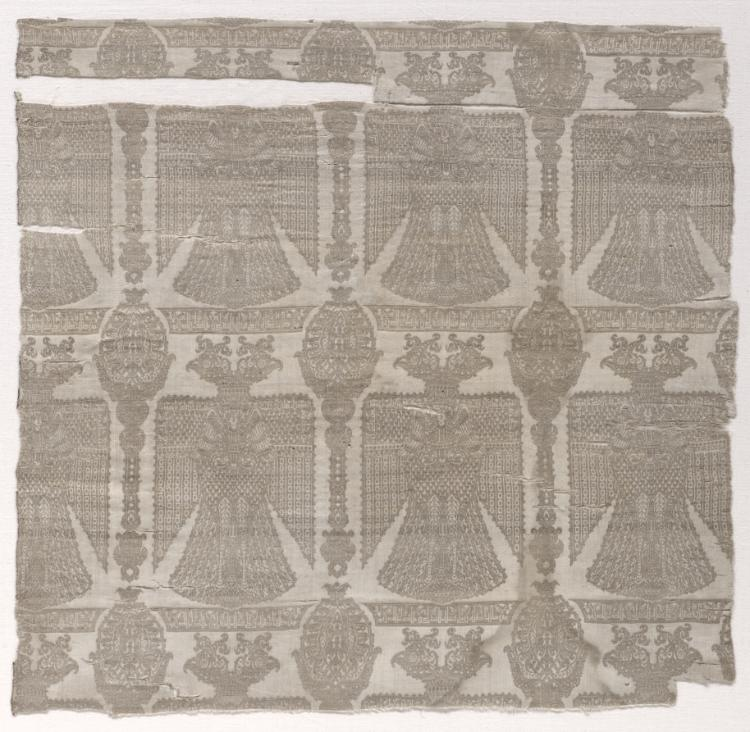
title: Fragment with Double-Headed "Simurgh"-Eagles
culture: Iran or Iraq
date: before 1953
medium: Silk: lampas weave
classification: Textile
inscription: man taba asluhu zakiya fi'luhu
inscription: man kabirat himmathuhu kathurat qimatuhu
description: Rows of aligned double-headed simurgh (eagles), in tan on a white ground supporting little winged human figures are within a grid consisting of horizontal bands of inscription in floriated Kufic lettering and palmette trees.